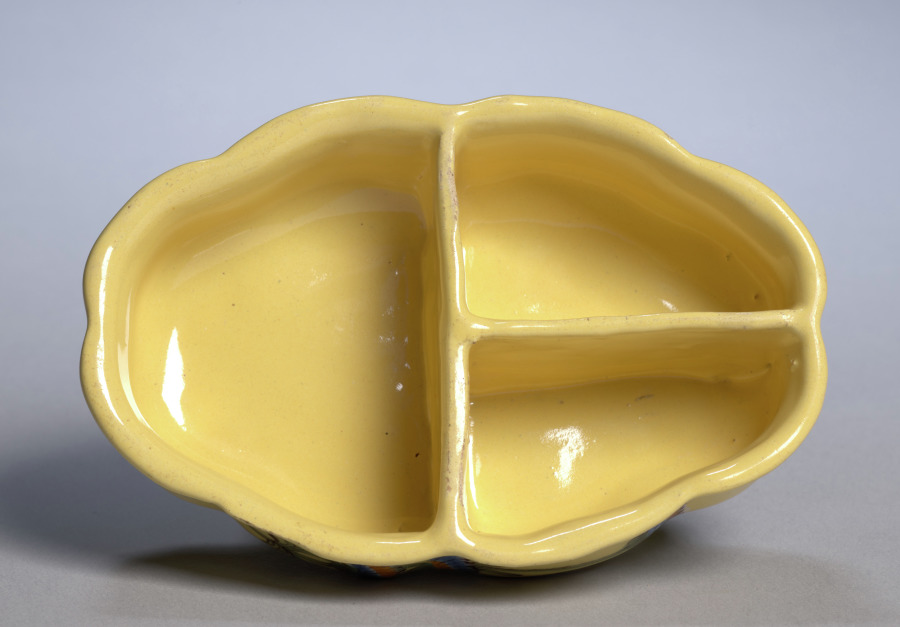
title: Spice Bowl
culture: France, Montpellier, 18th century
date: c. 1775–80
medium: faience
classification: Ceramic